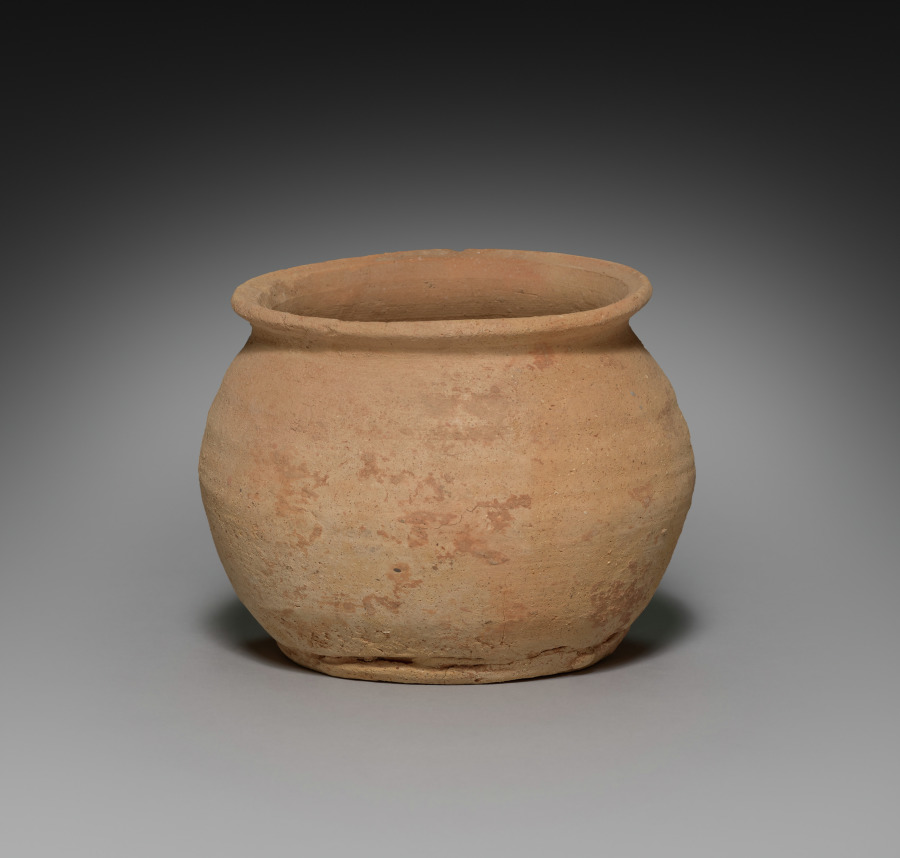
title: Covered Jar with Horn Handle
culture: Korea, Silla (57 BC-935) or Kaya (AD 42-562) period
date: 400s–500s CE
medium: red earthenware with applied red slip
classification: Ceramic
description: Early earthenware from the Three Kingdoms period (57 BCE–668) became widely utilized as agriculture and religion grew to be essential elements in sustaining society and its systems. The clay jars of different sizes and shapes on display were made for the following purposes: some were used to store harvested grains and seeds, some, especially lidded ones such as this example, to preserve cremated remains, and some to serve offerings in rituals.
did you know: Closed kilns built on hillsides became widely used for producing this type of pottery vessel in Korea during the Three Kingdoms period.